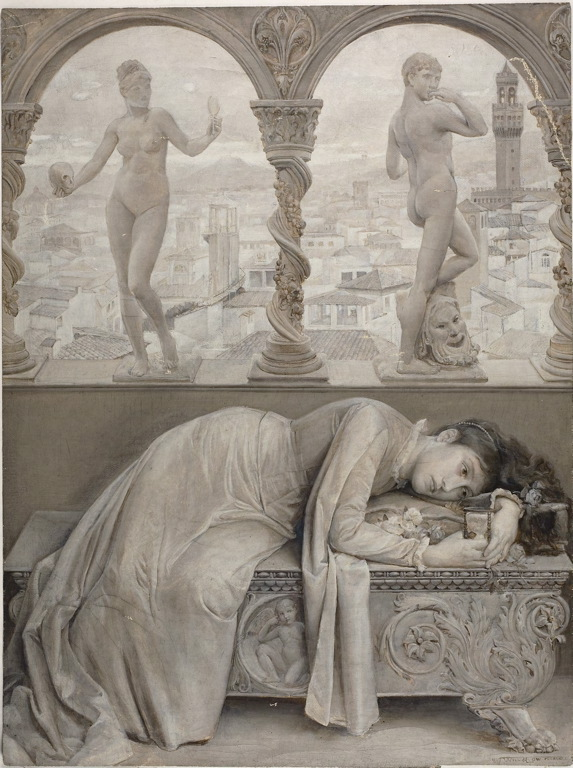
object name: Painting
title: Ode on Melancholy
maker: Will Hicock Low (American, 1853-1932)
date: 1887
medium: Oil on canvas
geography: United States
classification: drawings (visual works); prints and drawing; painting